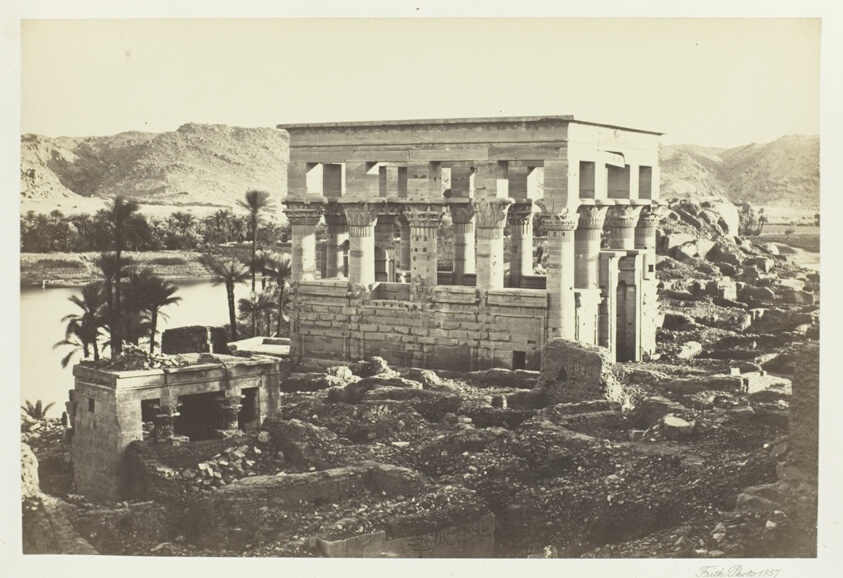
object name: Photograph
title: Pharoah's Bed, Philæ, from the Great Temple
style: 19th century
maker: Francis Frith (English, 1822–1898)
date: 1857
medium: Albumen print, pl. 7 from the album "Egypt and Palestine, Volume II" (1858/60)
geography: England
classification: albumen silver print; photographic process; photography; photograph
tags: Collected by Hugh Edwards, Egypt and Palestine